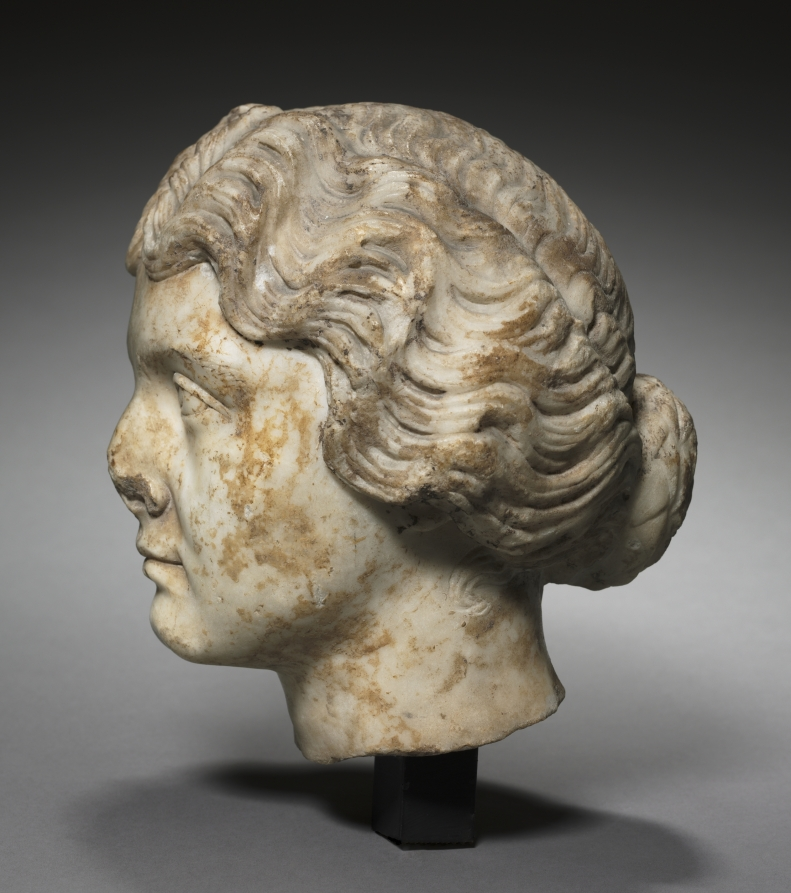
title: Portrait Head of a Woman, Probably the Empress Faustina Minor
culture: Italy, Roman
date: c. 165 CE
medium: marble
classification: Sculpture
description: Acquired in 1925, this head was initially identified as a portrait of the Empress Lucilla (lived AD 149-182), wife of the Emperor Lucius Verus, who co-ruled with Marcus Aurelius from AD 161-169. More recently, scholars have identified the portrait as a representation of the Empress Faustina Minor (lived c. AD 130-176/177), wife of Marcus Aurelius (r. 161-180) and mother of Lucilla. The two women, relatively close in age, share a number of portrait features: heavy-lidded eyes, with incised irises and pupils; small mouth; and a distinctive hairstyle, parted in the center and pulled back in waves to a braided knot at the base of the neck.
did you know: Scholars have disagreed about this portrait's identity—probably an empress, either Faustina Minor or Lucilla.